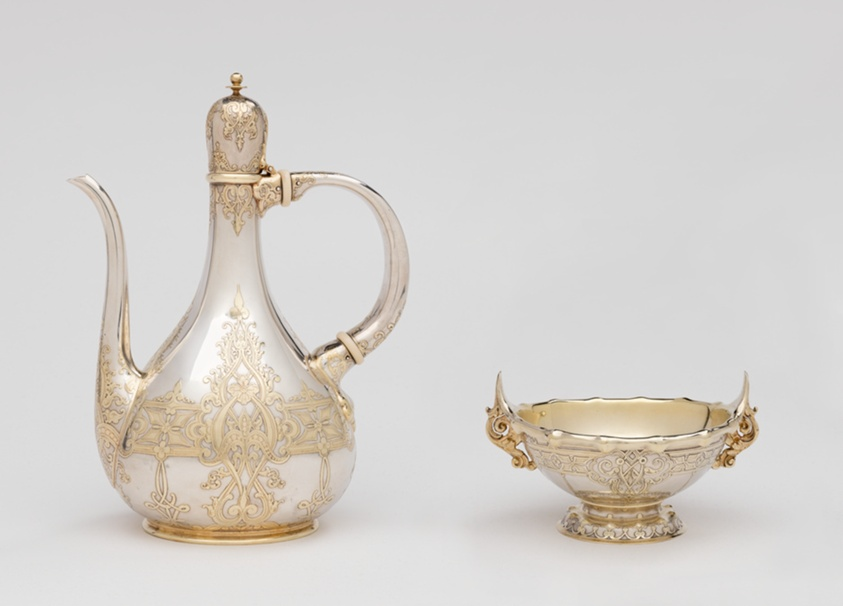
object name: Metalwork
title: "Saracenic" Coffee Pot and Sugar Bowl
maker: Design attributed to Edward C. Moore (American, 1827–1891); Tiffany and Company (American, founded 1837); New York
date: 1895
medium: Silver and silver gilt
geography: New York City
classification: decorative arts